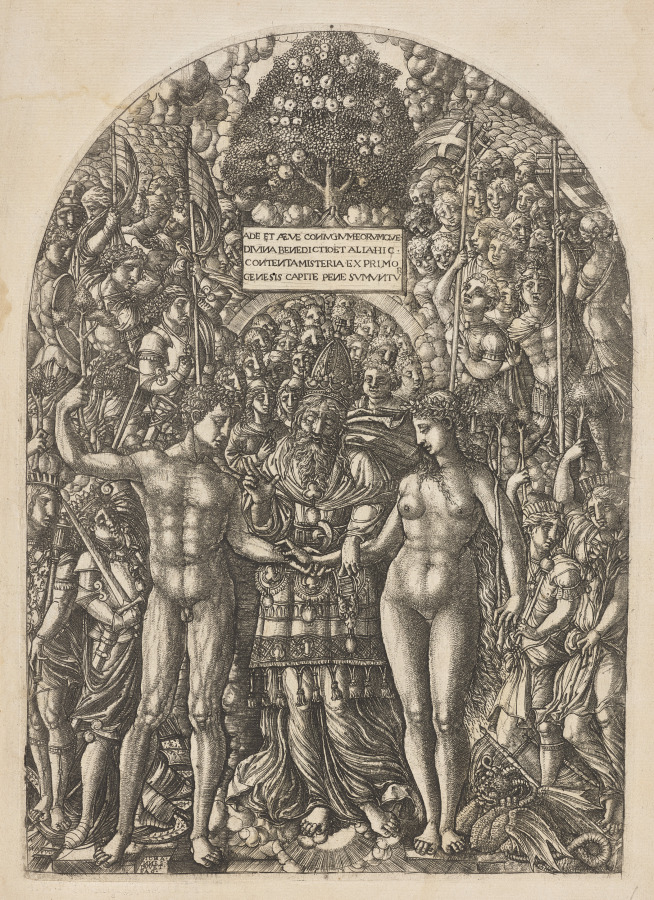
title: Marriage of Adam and Eve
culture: France, 16th century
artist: Jean Duvet (French, 1485–1561)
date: 1555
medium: engraving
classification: Print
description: This print is part of a bound volume of works illustrating the a narrative of the Apocalypse, taken from the Revelation of Saint John in the Bible. The 23 engravings in the series occupied the artist for a number of years and represent his greatest artistic achievement. The museum's volume is one of only seven known complete sets. Jean Duvet was one of the first major printmakers in France and one of the most original artists of the 1500s. Although he worked mostly in the provincial city of Langres, he became aware of Italian art through the circulation of prints—notably those of Marcantonio Raimondi. His solidly modeled human figures reflect the influence of the Italian High Renaissance. Duvet, however, developed an idiosyncratic, highly artificial style with crowded compositions that ignore rational space in favor of ornamental surface patterns.